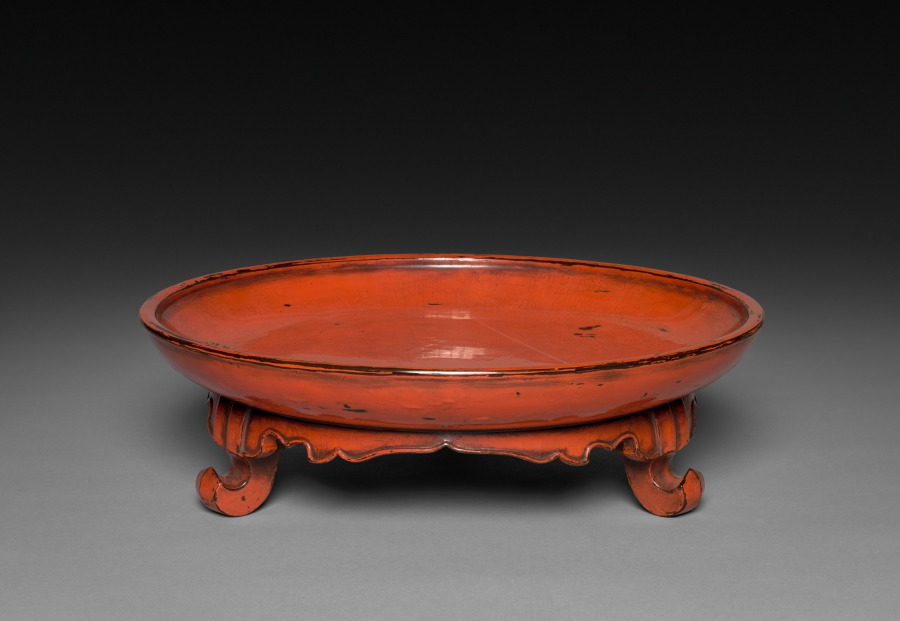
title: Tray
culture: Japan, Muromachi period (1392–1573)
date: 1392–1573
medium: Negoro lacquer on wood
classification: Lacquer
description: Negoro is a lacquer technique (named after the Negoro temple in Japan) in which several layers of red lacquer are applied over a black lacquer undercoating. Through years of handling, a natural surface of red and black random patterns results.